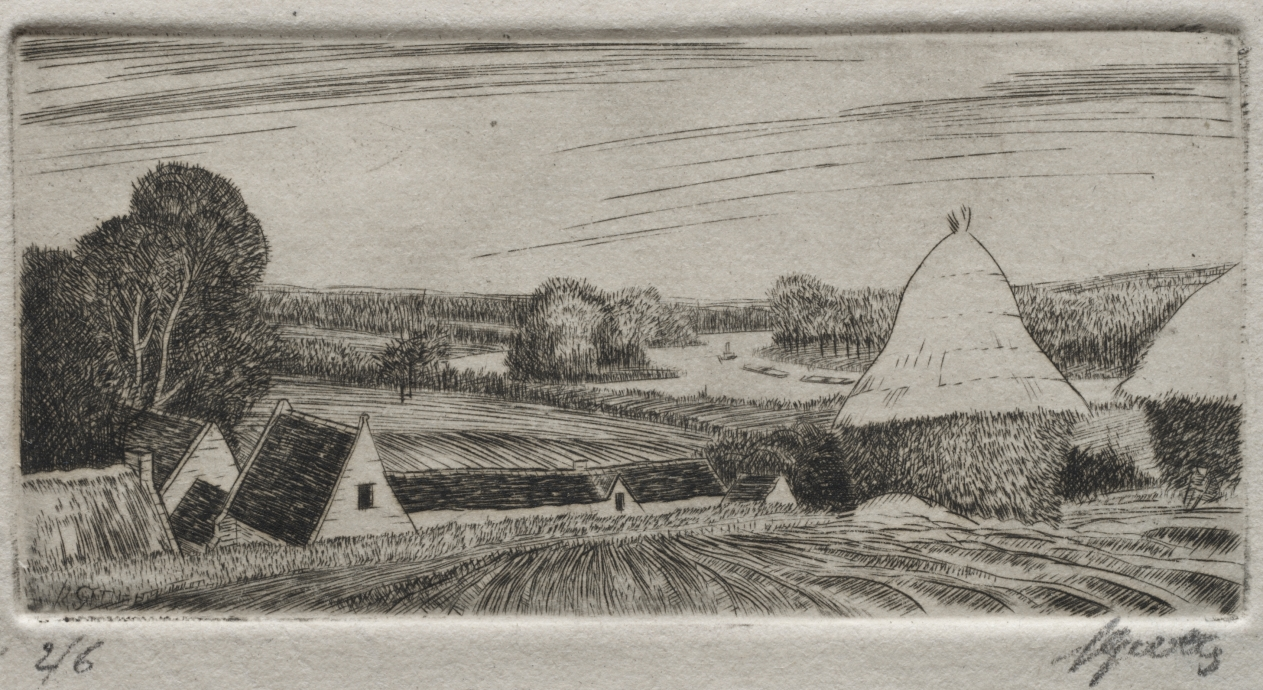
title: Brebant Farm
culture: France, 20th century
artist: Pierre Louis Gatier (French, 1878–1944)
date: c. 1898–1925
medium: etching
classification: Print